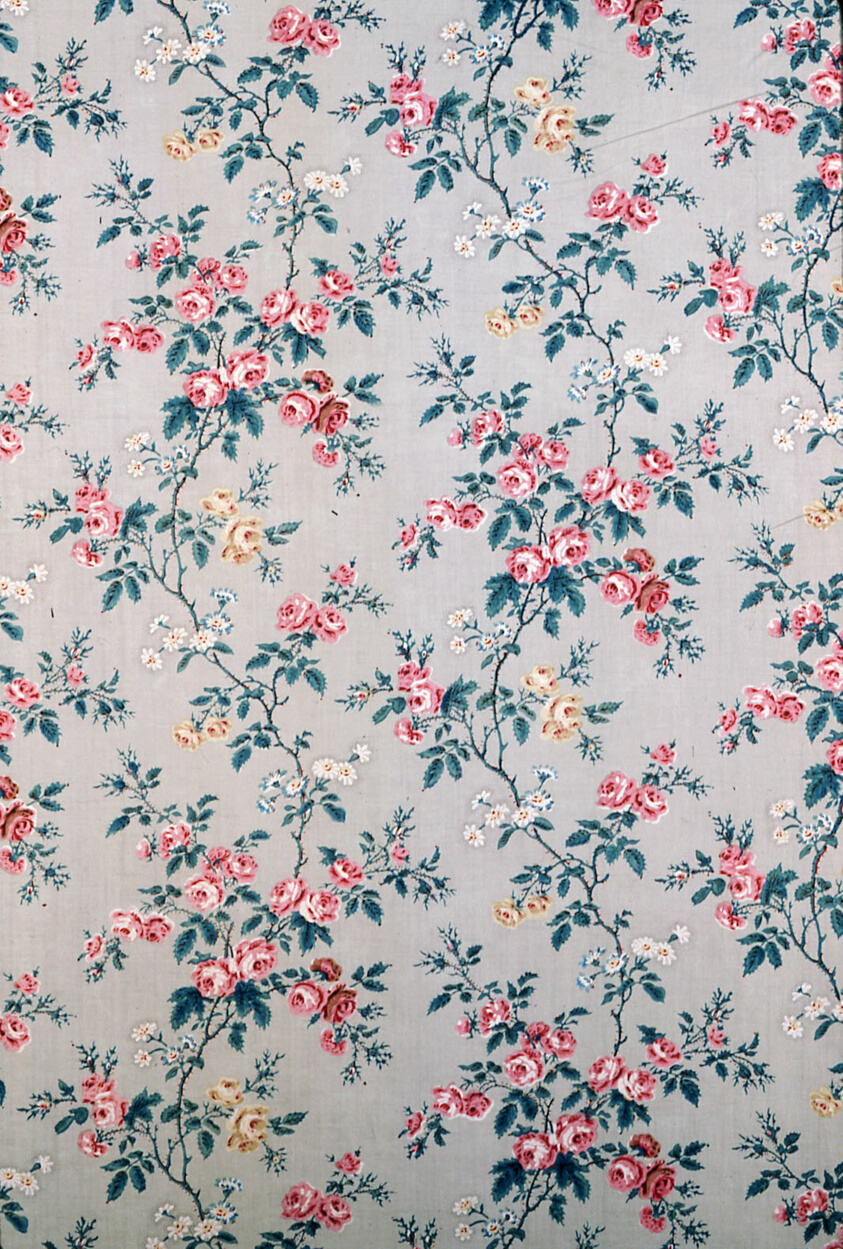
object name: Textile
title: Panel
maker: England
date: 1851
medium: Cotton, plain weave; roller and block printed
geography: England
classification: textile; weaving - printed